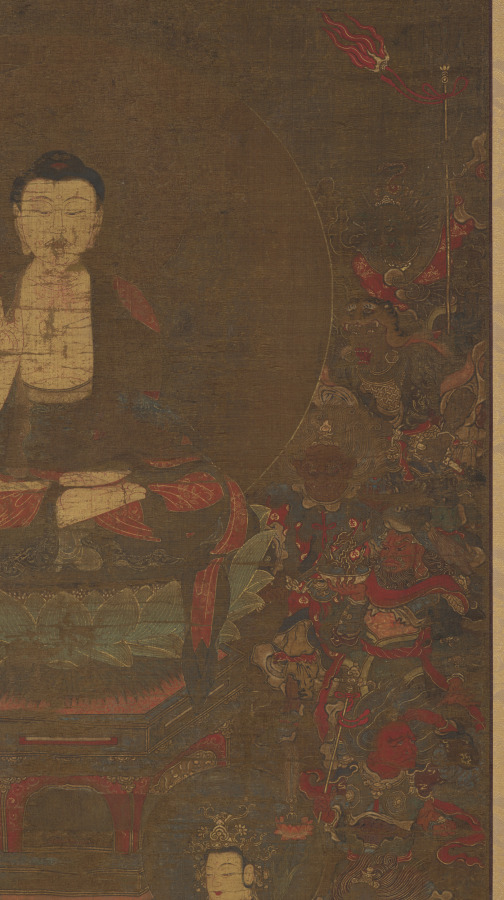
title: Shakyamuni with the Sixteen Benevolent Deities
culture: Japan, Nanbokuchō period (1336–92)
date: mid- to late 1300s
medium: Hanging scroll; ink, color, gold and cut gold on silk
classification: Painting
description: The historical Buddha Shakyamuni forms a triad with the bodhisattvas Fugen and Monju. Sixteen deities who protect the Buddhist scripture called the Great Perfection of Wisdom Sutra surround them. At the bottom left stands the Chinese monk Xuanzang, noted as a Buddhist scholar and translator of religious texts from India, including the Great Wisdom Sutra.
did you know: This painting would have been the main icon for ceremonial readings of the Great Perfection of Wisdom Sutra.